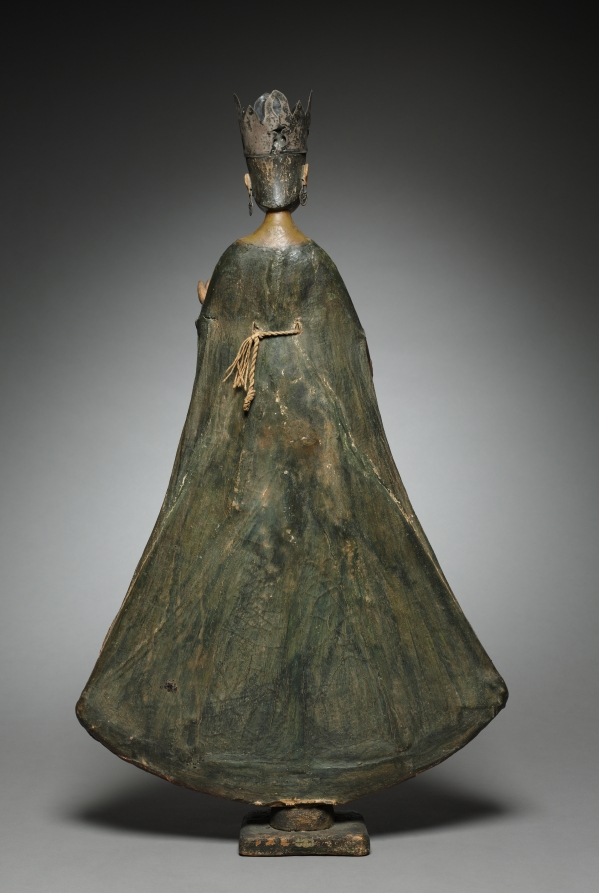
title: Santos: Virgin Crowned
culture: America, New Mexico, 19th century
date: 1800s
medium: painted wood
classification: Sculpture